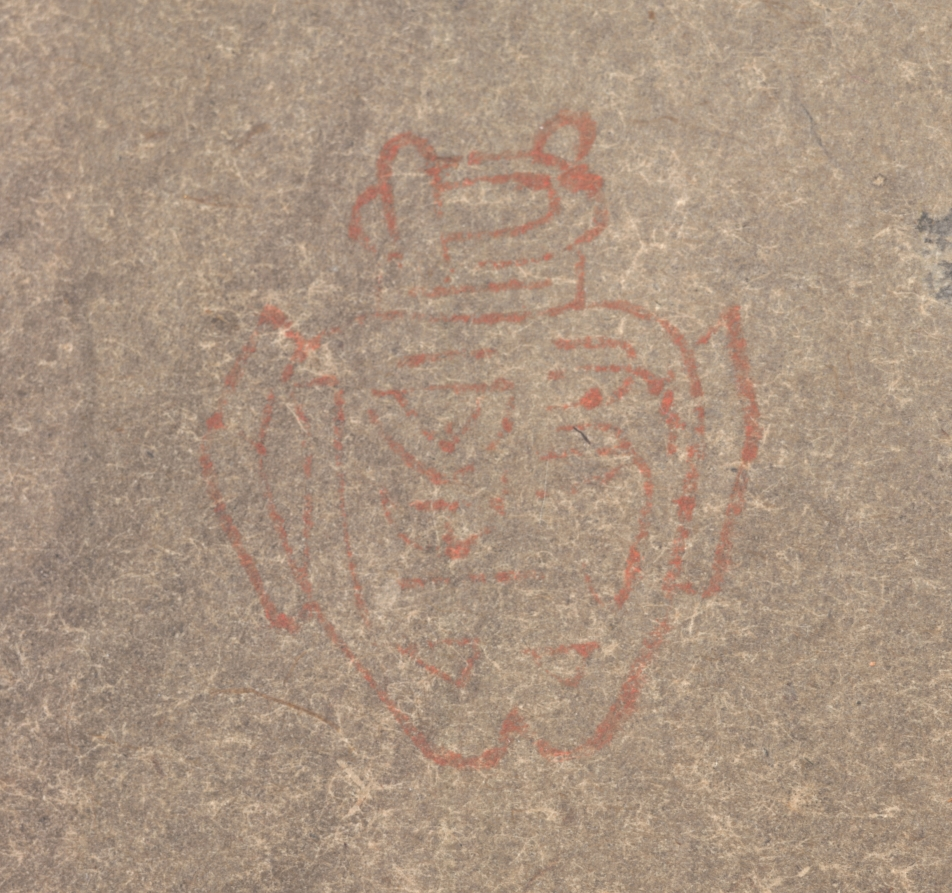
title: Hotei with Daoist Immortals: Immortal Riding Carp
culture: Japan, Edo period (1615–1868)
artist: Kyūseki Tomonobu (Japanese, 1653–1721)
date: late 1600s-early 1700s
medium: triptych of hanging scrolls: ink on paper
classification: Painting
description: Hotei was a Chan (Japanese: Zen) monk living in China during the 900s who, in the 1300s, became a legendary figure in Japan. At that time a popular cult praising him sprang up, extending beyond Zen to other religious communities. This rare triptych embraces a central Zen icon with flanking Daoist images, thereby suggesting the compatibility, rather than the exclusivity, of these two creeds. Hotei also enjoys popularity in Japan as a kind of genre, or folk figure, which explains his mirthful expression in Japanese paintings. The Daoist figures in contrast appear eccentric and foreign-looking, in keeping with Daoist lore. When these paintings came to the museum their appearance was compromised by poor quality textile mountings and cracked paper surfaces deserving of restoration. The fact that these scrolls constituted an integral set that properly had to be shown as a unit heightened the need to stabilize their condition and improve their presentation for museum visitors. A complete remounting of each scroll occurred following the cleaning of the paper surfaces and the repair of the lifting surface areas. No inpainting was done, thereby preserving the original ink values and brushstrokes.